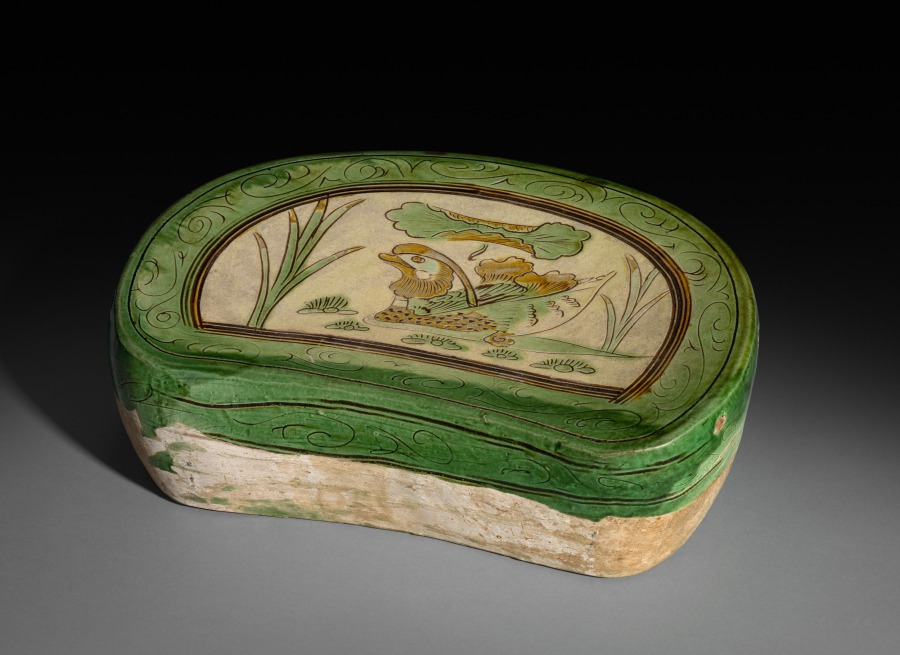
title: Pillow with Mandarin Duck: Cizhou Ware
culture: China, Jin dynasty (1115-1234)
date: 12th-13th Century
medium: earthenware, incised and slip-coated with three color glaze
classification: Ceramic